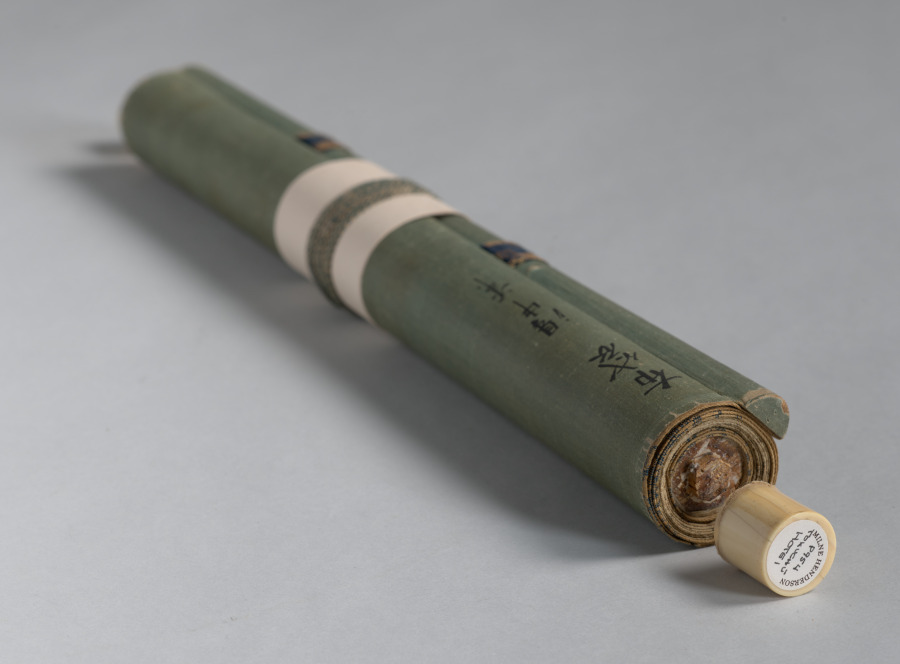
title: Hotei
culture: Japan, Muromachi period (1392–1573)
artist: Tokuchū (Japanese, late 1400s)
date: late 1400s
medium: hanging scroll; ink on paper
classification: Painting